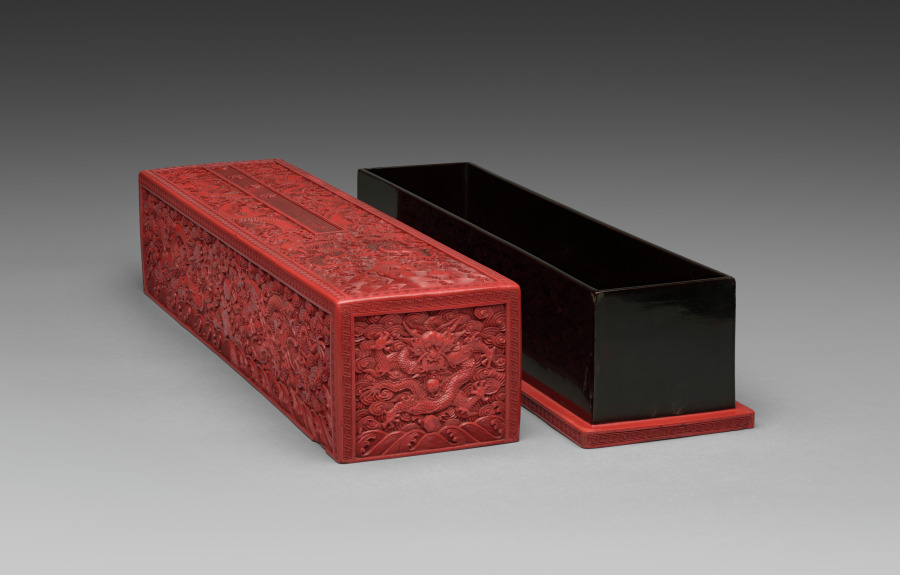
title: Carved Lacquer Scroll Box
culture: China, Qing dynasty (1644–1911), Qianlong reign (1736–95)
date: 1736–95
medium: Red carved lacquer on wood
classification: Lacquer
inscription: 心寫治平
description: The elaborate design, superior craftsmanship, and inscription carved into the red cinnabar lacquer proclaim the imperial pedigree of this scroll box. On either end is a five-clawed dragon, a design reserved only for an emperor. More dragons twist and wind through swirling clouds and waves along the length of the box’s sides and top. The carving is intricate and vigorous, while the design is controlled and regular. This box housed the private portraits of the Qianlong Emperor, his empress, and 11 other favorites among his presumed 40 or more wives during his 60-year reign. It was commissioned to be made in Suzhou when no more portraits were added to the scroll. An entry in the imperial workshop records relates to the Cleveland box. It states that in 1787, a box design with a dragon pattern, including the inscription, In his heart is envisioned a peaceful reign, was sent to a Suzhou workshop. Imperial portraits were collected in the Chonghua Palace in the Forbidden City, and the emperor’s portrait was kept in this red lacquer box from Suzhou.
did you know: This is the original box for the handscroll Portraits of the Qianlong Emperor and His Twelve Consorts, CMA 1969.31.